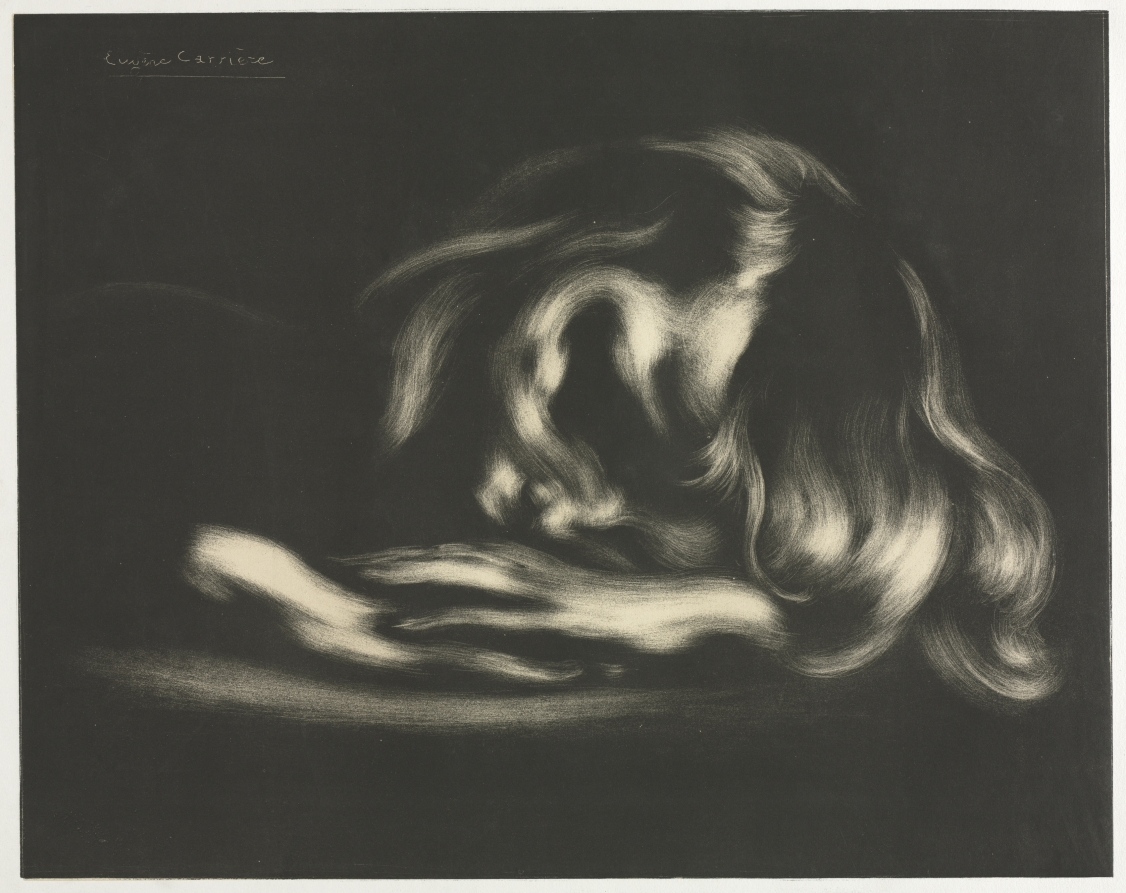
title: Sleep (Jean-René Carrière), from L'Album d'estampes originales de la Galerie Vollard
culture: France, 19th century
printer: Auguste Clot (French, 1858–1936)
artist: Eugène Carrière (French, 1849–1906)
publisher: Ambroise Vollard (French, 1867–1939)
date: 1897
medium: lithograph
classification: Print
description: Eugène Carrière developed an unusual approach to lithography, typically working from dark to light, as seen in this portrait of his young son Jean-René. Rather than drawing with a lithographic crayon, Carrière covered his entire stone with ink, which he then wiped and scraped away to create areas where the paper would show through when printed. Here, the visual effects of this technique combine with expressive, almost abstract forms to give the subject a fantastic, dreamlike atmosphere.